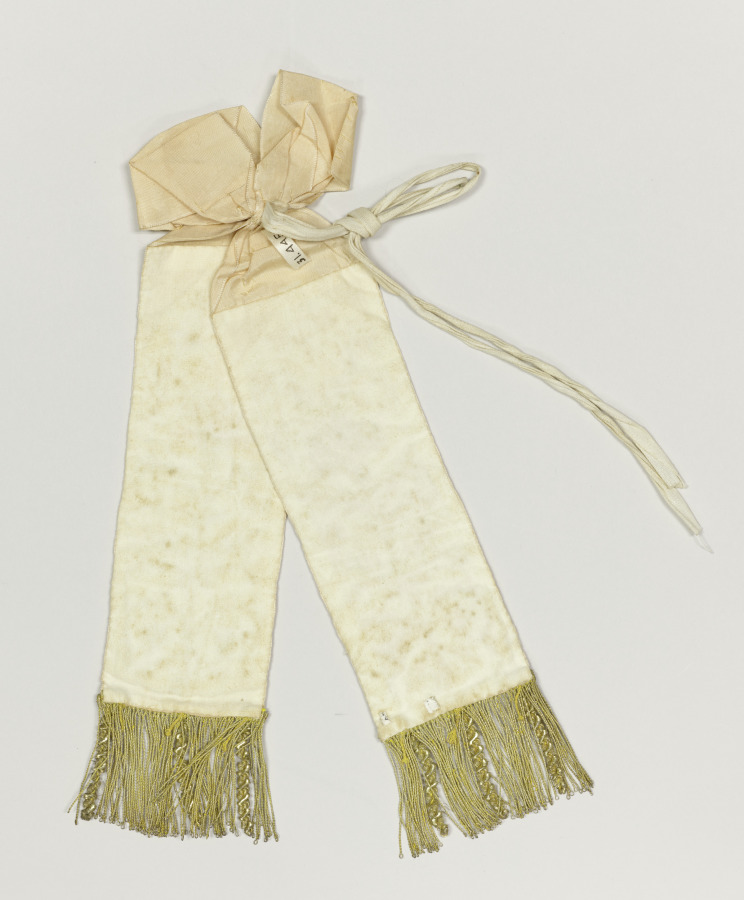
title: Woman's Costume (White Silk Band)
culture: Italy, Sicily, 19th century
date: 1800s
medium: silk (white) with metal thread embroidery and sequins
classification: Garment